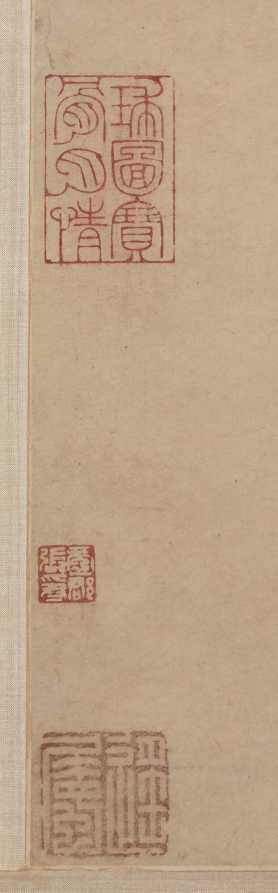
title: Landscape after Guo Zhongshu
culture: China, Qing dynasty (1644-1911)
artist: Bada Shanren (Chinese, 1626–1705)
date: c. 1680–1705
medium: Hanging scroll; ink on paper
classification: Painting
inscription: Artist's inscription, signature, and 3 seals: Painting after Guo Shuxian [Guo Zhongshu]. Bada shanren. [2 seals] Shanren; Kede shenxian 可得神仙. [seal, lower left corner] Yaozhu 遥属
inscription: 8 additional seals: 1 of Li Shifen (1821-1885); 4 of Chang Yüan 張爰 [Zhang Daqian 張大千] (1899-1983); 3 unidentified.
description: Similar to some calligraphers of his time, Zhu Da rejected conventions in favor of an individual, personal expression. He is known for ambiguous compositions of fish, flowers, birds, and rocks in contrasting ink tonality. As a member of the Ming imperial family, Zhu lost his princely status and hid in a monastery when the Manchus, foreigners from the north, established the Qing dynasty in 1644. In this late work, mountain ranges are rendered in diverse and dense strokes rising toward the top of the scroll. It references the artist Dong Qichang (1555–1636) in concept. Yet the cursory brushwork and composition present Zhu’s personal style.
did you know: Zhu Da's inscription acknowledges that this painting was done after the early Song master Guo Zhongshu 郭忠恕, but there is almost no tangible stylistic relation to be found between Zhu Da and his 10th-century model.